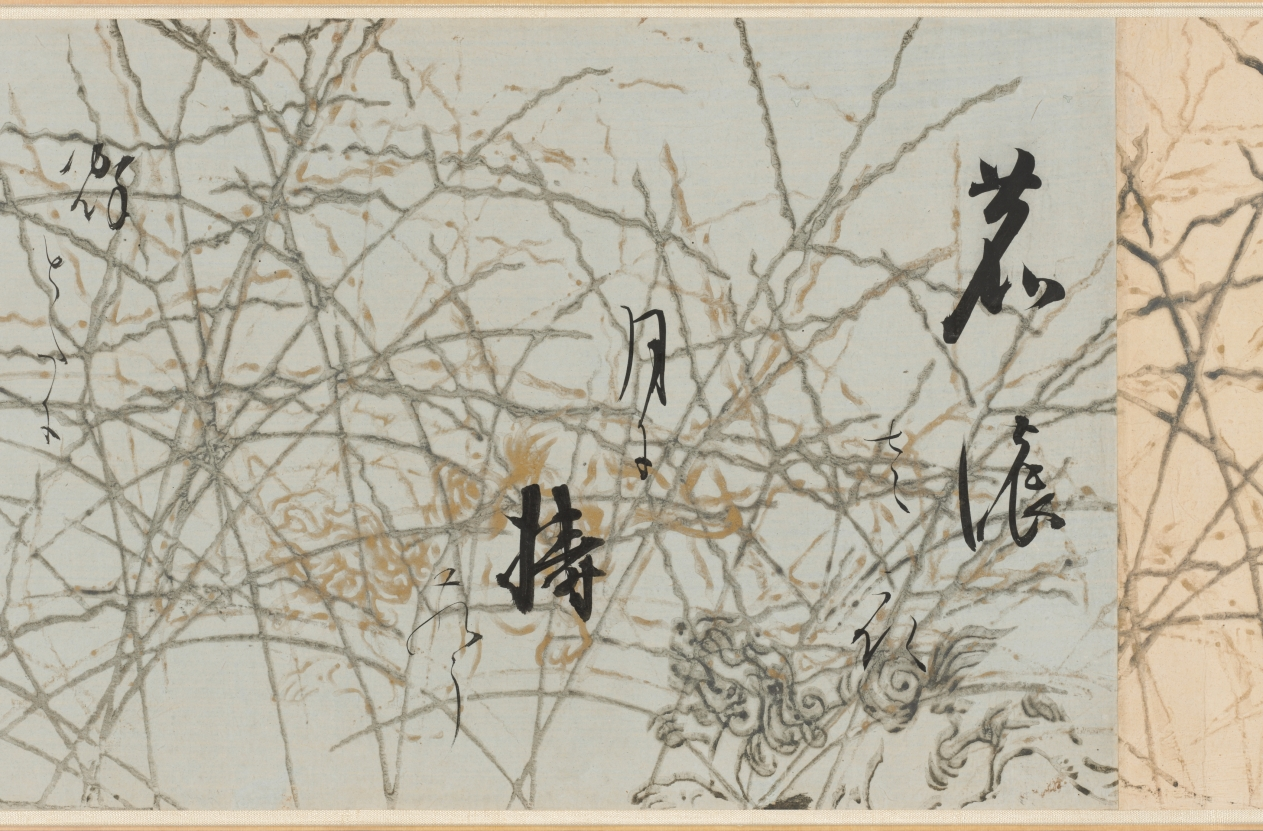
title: Selections from the New Collection of Japanese Poems from Ancient and Modern Times (Shinkokin wakashū) with Printed Designs of Chinese Lions and Crab Finger Grass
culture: Japan, Edo period (1615–1868)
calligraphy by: Hon'ami Kōetsu (Japanese, 1558–1637)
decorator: Tawaraya Sōtatsu (Japanese, c. 1570–c. 1640)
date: early 1600s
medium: handscroll; ink, gold, and silver on paper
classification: Calligraphy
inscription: Seal: 光悦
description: Hon’ami Kōetsu was a calligrapher and craftsman who frequently collaborated with the painter Tawaraya Sōtatsu, considered the first master of the Rinpa school. Kōetsu brushed seven poems from the autumn section of a poetry anthology onto dyed paper with motifs designed and printed in gold and silver by Sōtatsu.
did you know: Before becoming a master painter of screens, Tawaraya Sōtatsu painted fans.